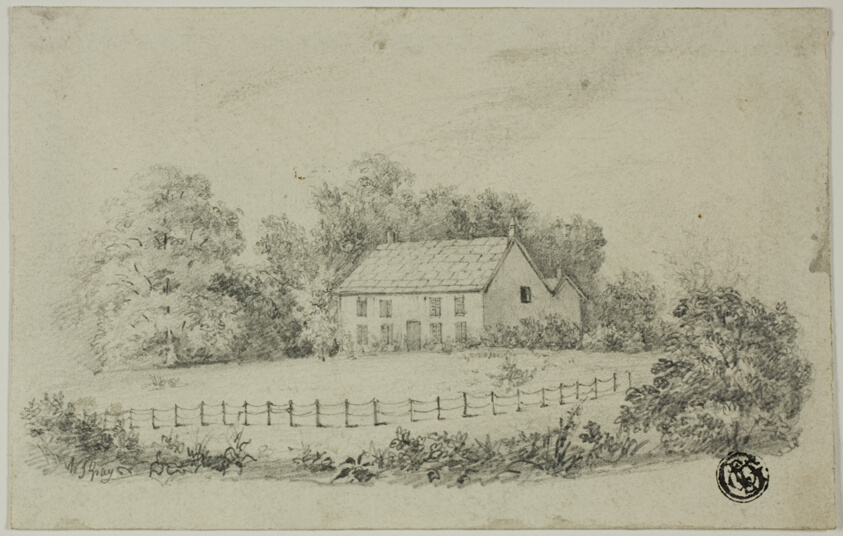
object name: Drawing and Watercolor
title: House with Garden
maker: William John Gray of Salisbury (English, 1817-1895)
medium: Graphite, on ivory wove paper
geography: England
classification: graphite; drawings (visual works); prints and drawing